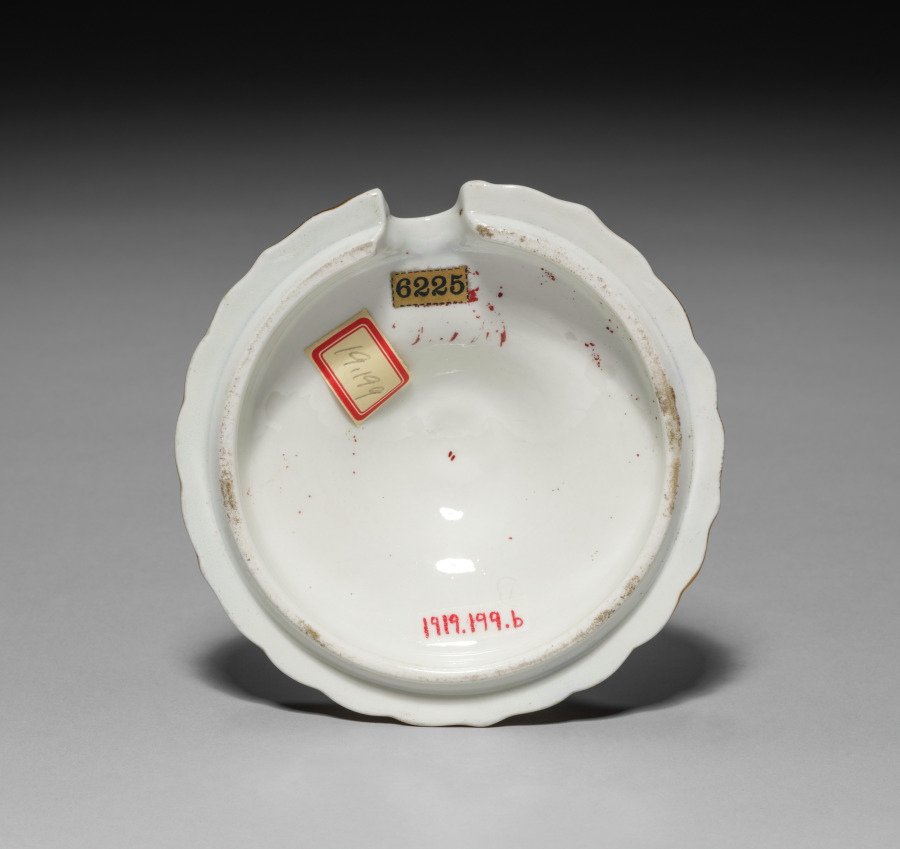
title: Cover for a Bowl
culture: England, 18th century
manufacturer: Worcester Porcelain Factory (British, established 1751)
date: c. 1770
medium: porcelain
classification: Ceramic